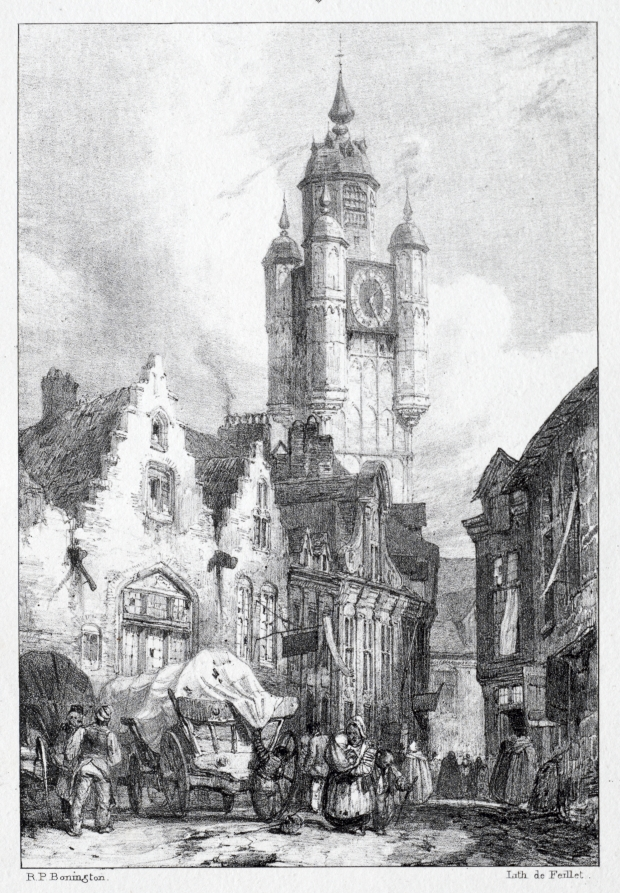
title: Bergues: La Tour du marché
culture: England, 19th century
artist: Richard Parkes Bonington (British, 1802–1828)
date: 1824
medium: lithograph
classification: Print